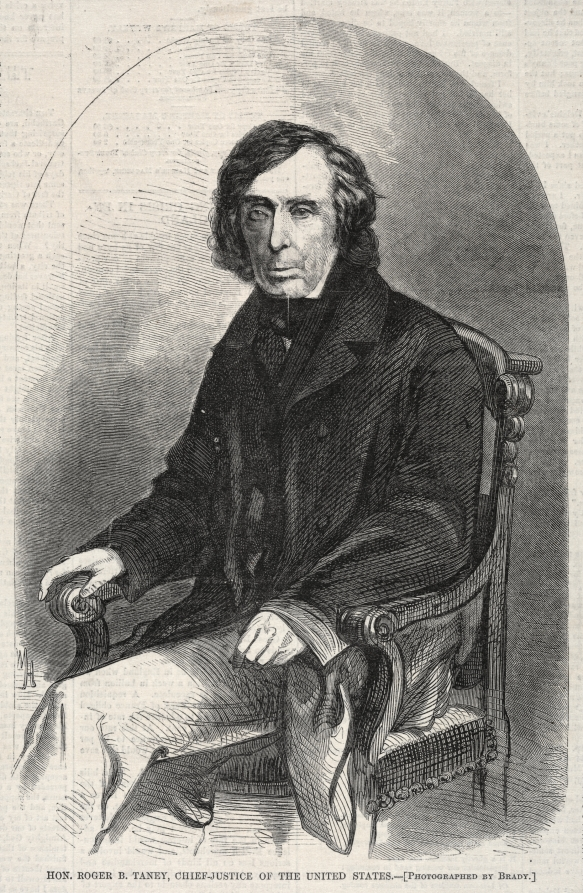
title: Hon. Roger B. Taney, Chief Justice of the United States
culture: America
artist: Winslow Homer (American, 1836–1910)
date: 1860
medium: wood engraving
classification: Print